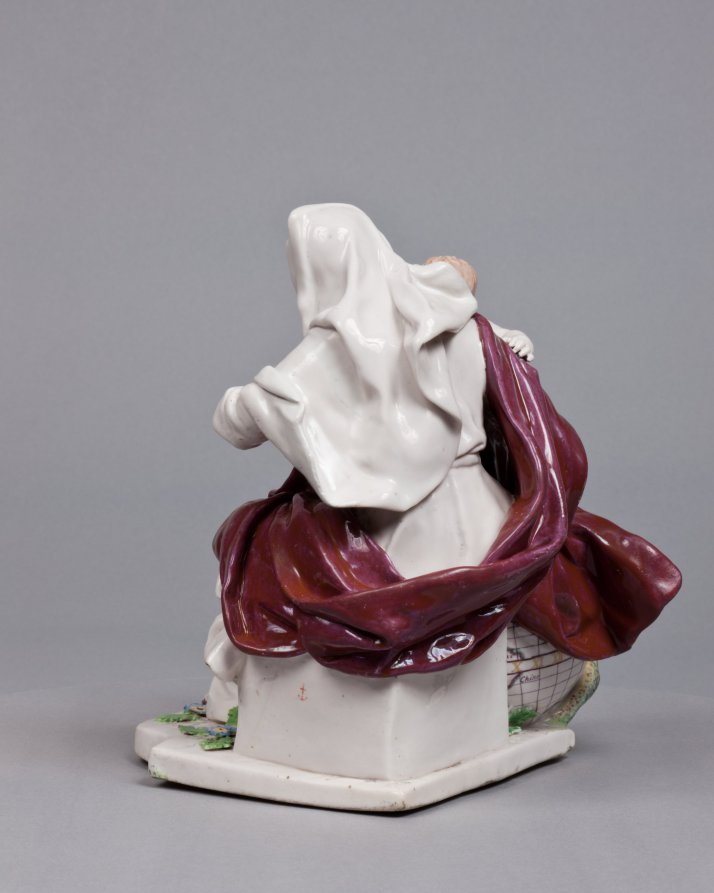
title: Madonna and Child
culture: England, Chelsea, 18th century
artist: Chelsea Porcelain Factory (Britain, London, 1745–84)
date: c. 1755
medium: porcelain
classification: Ceramic